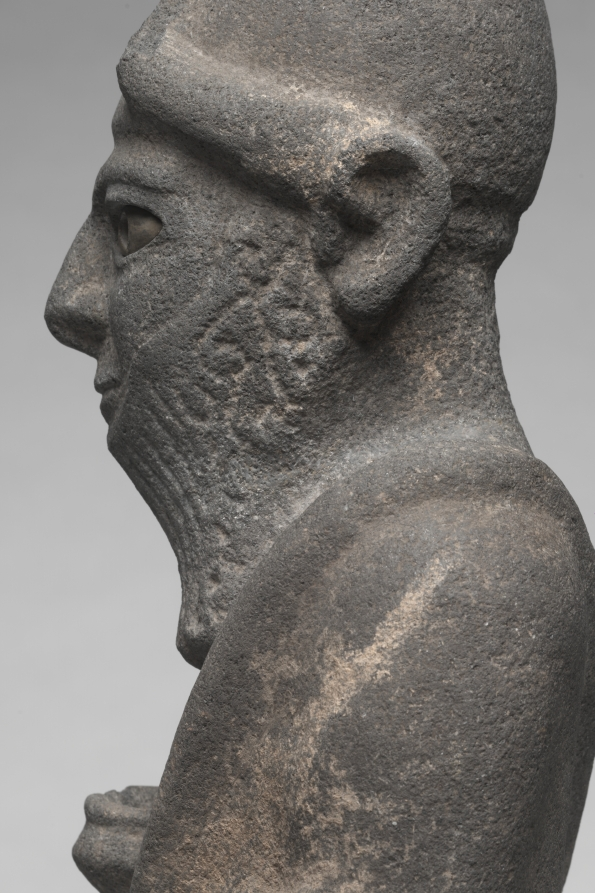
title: Priest-King or Deity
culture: Hittite, North Syria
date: c. 1600 BCE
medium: basalt with bone eyes (left, ancient; right, restored)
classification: Sculpture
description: The Hittites migrated into Anatolia in the 3rd millennium BCE and spoke an Indo-European language, a group that includes Greek, Latin, Persian, Sanskrit, English, and most modern European languages. They were the first ancient people to use iron for weapons. From about 1600–1200 BCE their empire was at its peak, extending from central Anatolia to Syria, and south along the eastern Mediterranean. Their vast empire and interest in commerce enabled the Hittites to spread Mesopotamian ideas and culture throughout the ancient Mediterranean world. This large basalt sculpture is exceptionally rare in depicting a Hittite god or priest-king wearing a horned conical crown, false beard, and long robe. He holds a bowl in his right hand and once held something in his left, perhaps a staff or sword.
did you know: The left eye of the sculpture is the original bone inlay while the right eye is a modern restoration done after the piece was damaged.